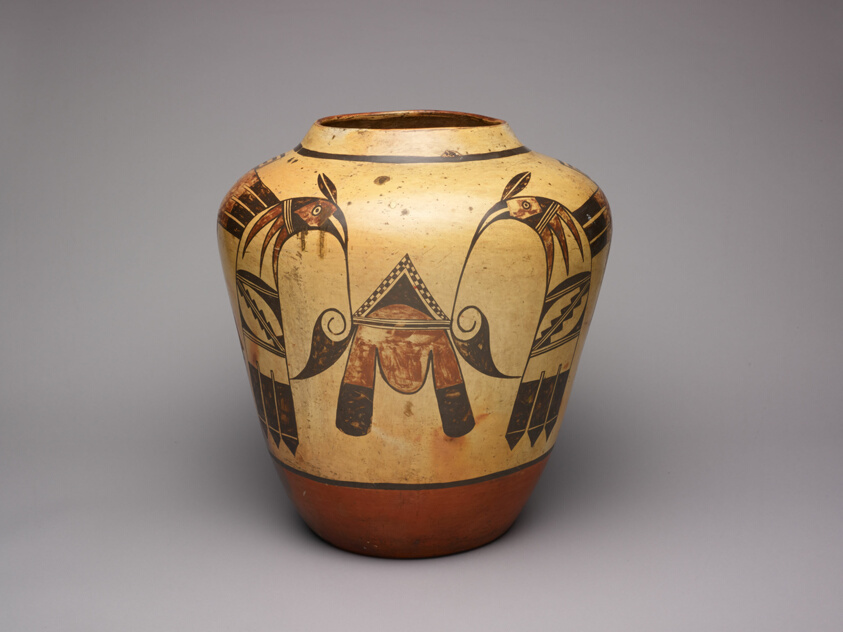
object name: Vessel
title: Polychrome Jar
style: hopi, pueblo, native american, americas, southwest, native north american, Arts of the Americas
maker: Hopi; Hopi, First Mesa, Arizona, United States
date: c. 1920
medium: Ceramic and pigment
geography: Arizona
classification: earthenware; art of the americas; ceramics; vessel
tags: abstract figures, animals, birds, servingware